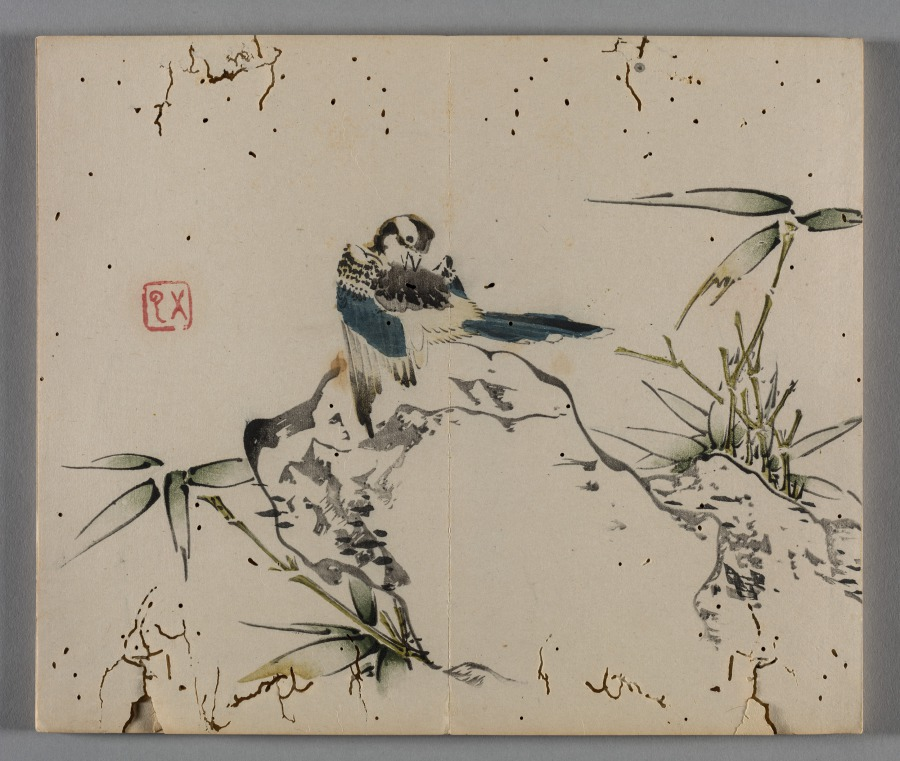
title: Ten Bamboo Studio Painting and Calligraphy Handbook (Shizhuzhai shuhua pu): Birds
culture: China, Qing dynasty (1644-1911)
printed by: Hu Zhengyan (Chinese, c. 1584–1674)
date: 1633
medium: Woodblock-printed book; ink and colors on paper; first edition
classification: Print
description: Color printing reached a level of perfection in the early 1600s, as seen in this Ten Bamboo Studio Collection of Calligraphy and Painting and the Mustard Seed Garden Manual of Painting (printed 1679 and 1701). The painterly quality, precision in registering (aligning) the woodblocks, and harmonious colors made them the most successful color print editions in Chinese history. Both editions were printed and compiled in Nanjing, spread nationwide, and had a great impact on the arts in Japan and Korea.